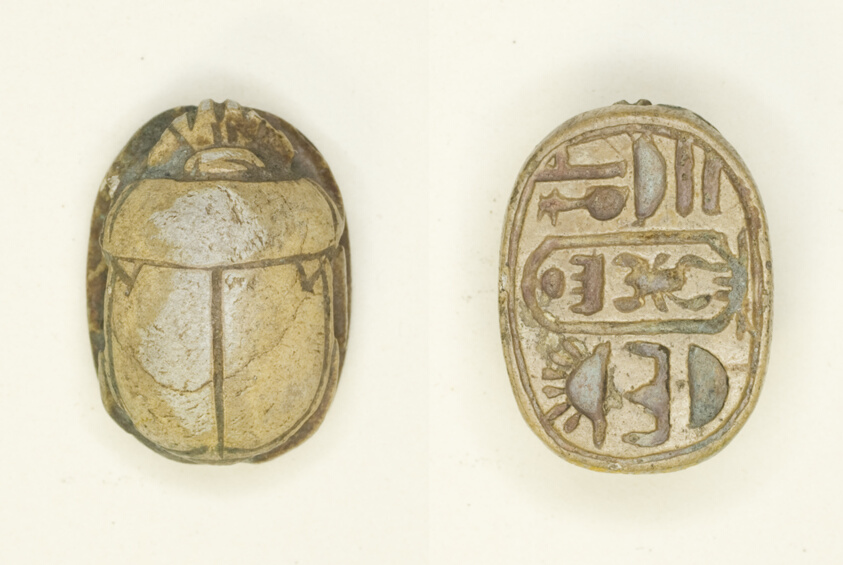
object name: Costume and Accessories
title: Scarab: Menkheperura (Thutmose IV)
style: new kingdom, eighteenth dynasty, egyptian, ancient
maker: Egyptian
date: New Kingdom, Dynasty 18, Reign of Thutmose IV (about 1400–1390 BCE)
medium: Steatite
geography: Egypt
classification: scarab; ancient art; costume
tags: Hieroglyphs, cartouches, insects, king, kings, pharaohs